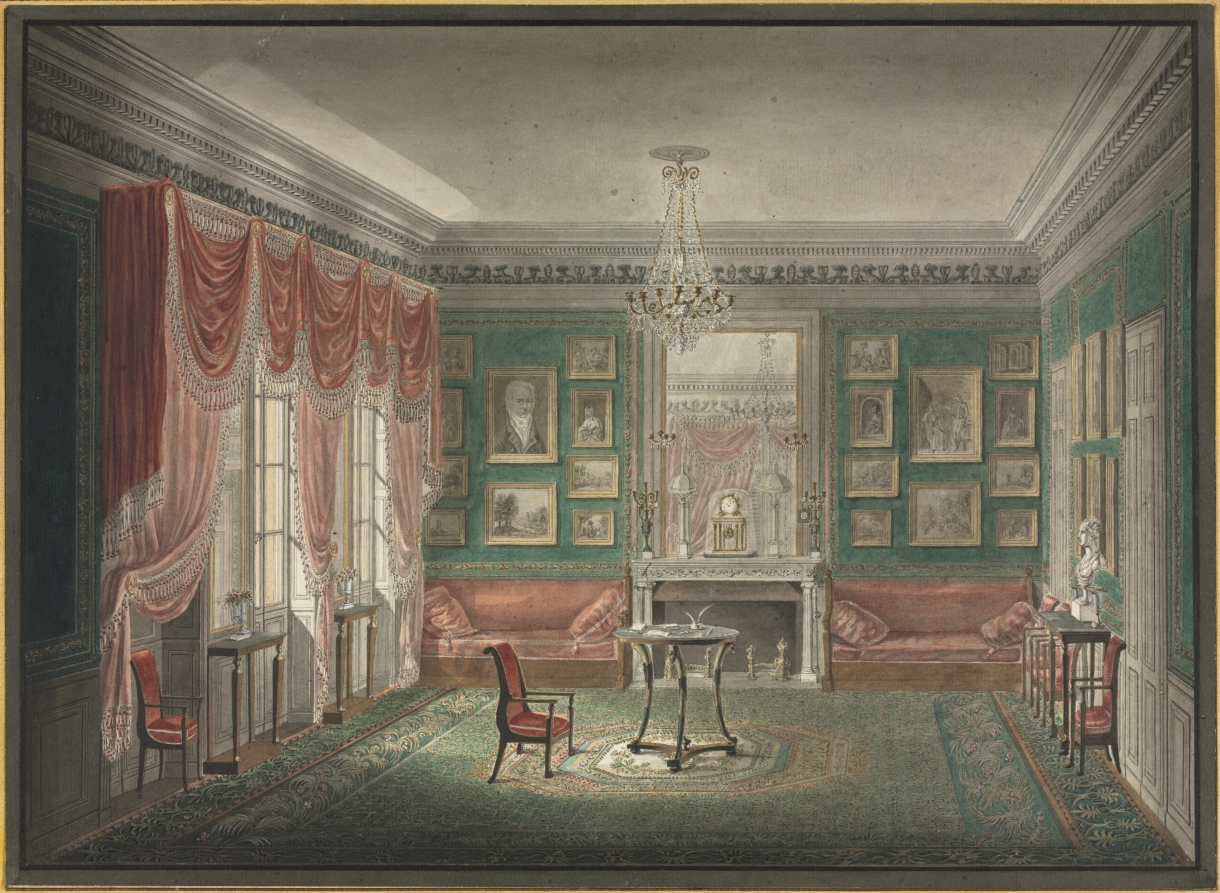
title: Interior View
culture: Russia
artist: Anonymous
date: c. 1805–10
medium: watercolor and pen and black ink heightened with white, shell gold, and touches of other opaque colors and with traces of graphite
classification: Drawing